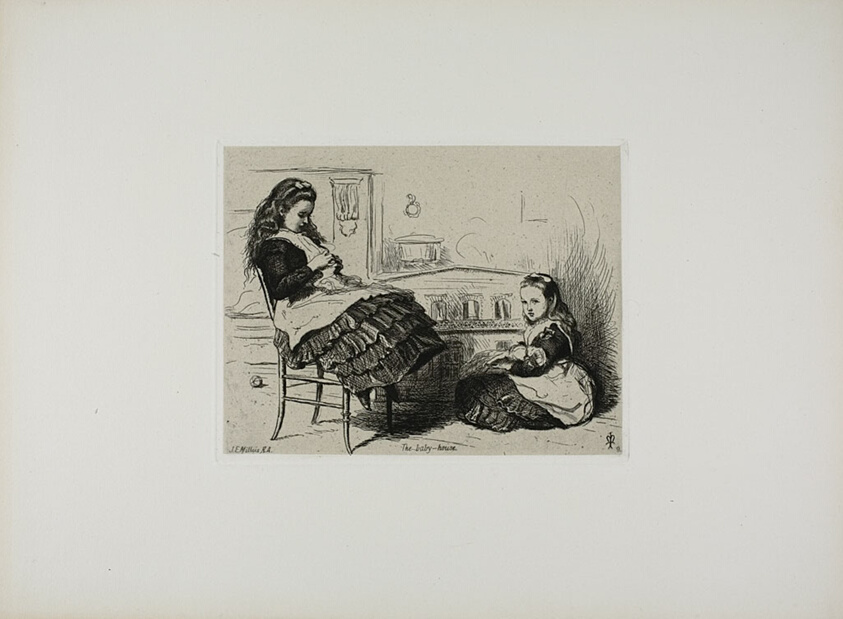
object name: Print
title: The Baby House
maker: Sir John Everett Millais (English, 1829-1896)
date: 1863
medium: Etching on cream chine, laid down on ivory wove paper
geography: England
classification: etching; print; prints and drawing